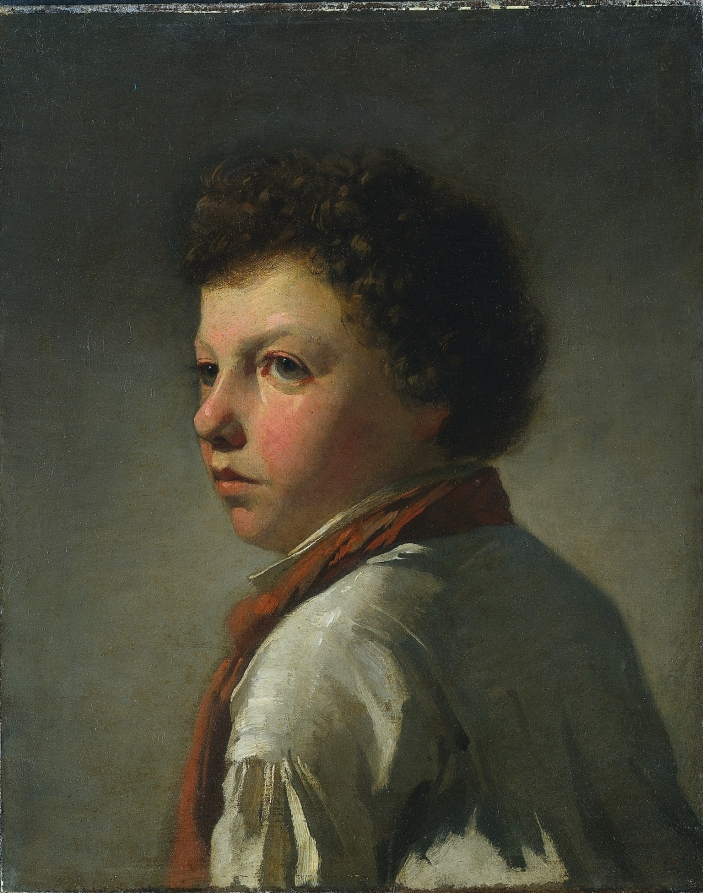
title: Portrait of a Young Man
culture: France, 19th century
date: not dated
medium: oil on fabric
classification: Painting